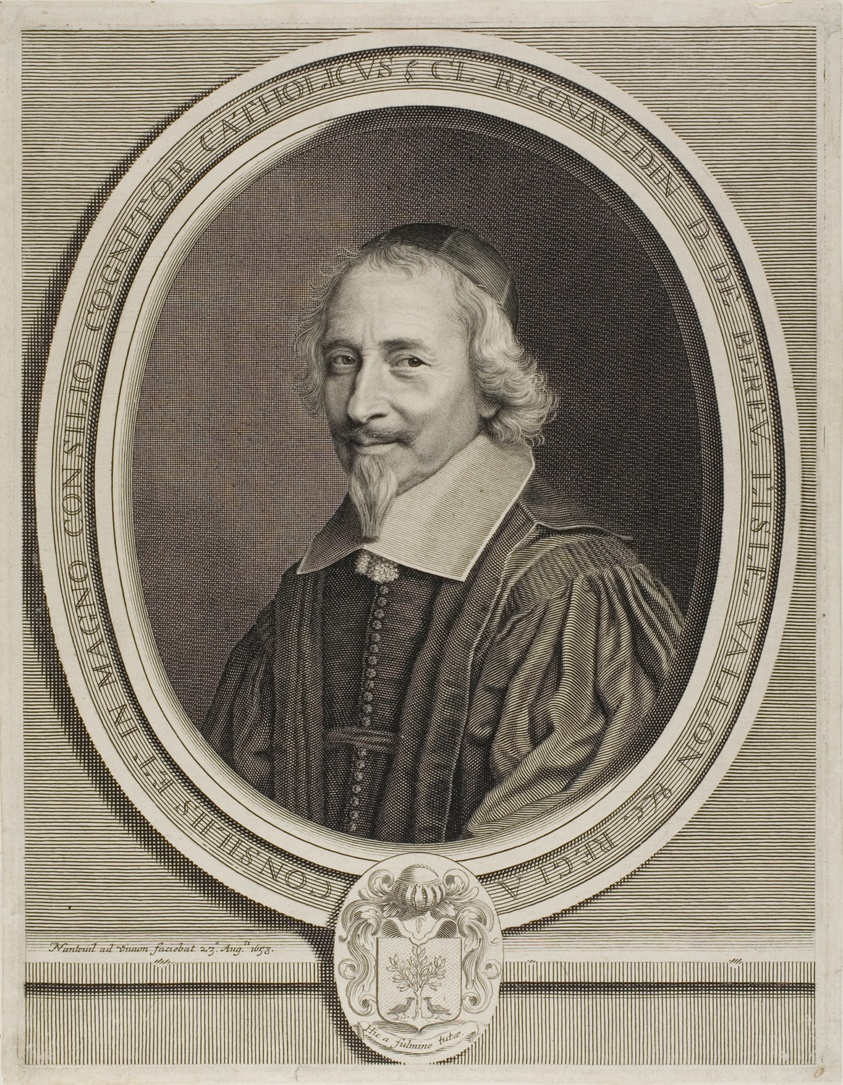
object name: Print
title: Claude Regnauldin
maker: Robert Nanteuil (French, 1623-1678)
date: 1658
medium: Engraving on paper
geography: France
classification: engraving; print; prints and drawing